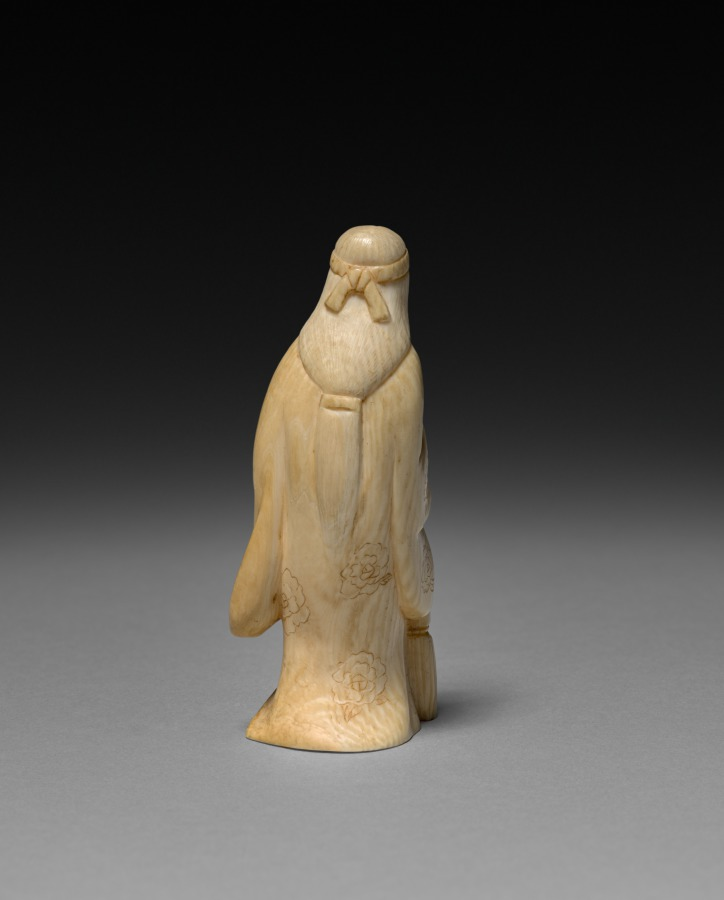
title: Woman with Broom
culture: Japan, Meiji period (1868–1912)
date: early 1900s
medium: ivory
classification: Ivory